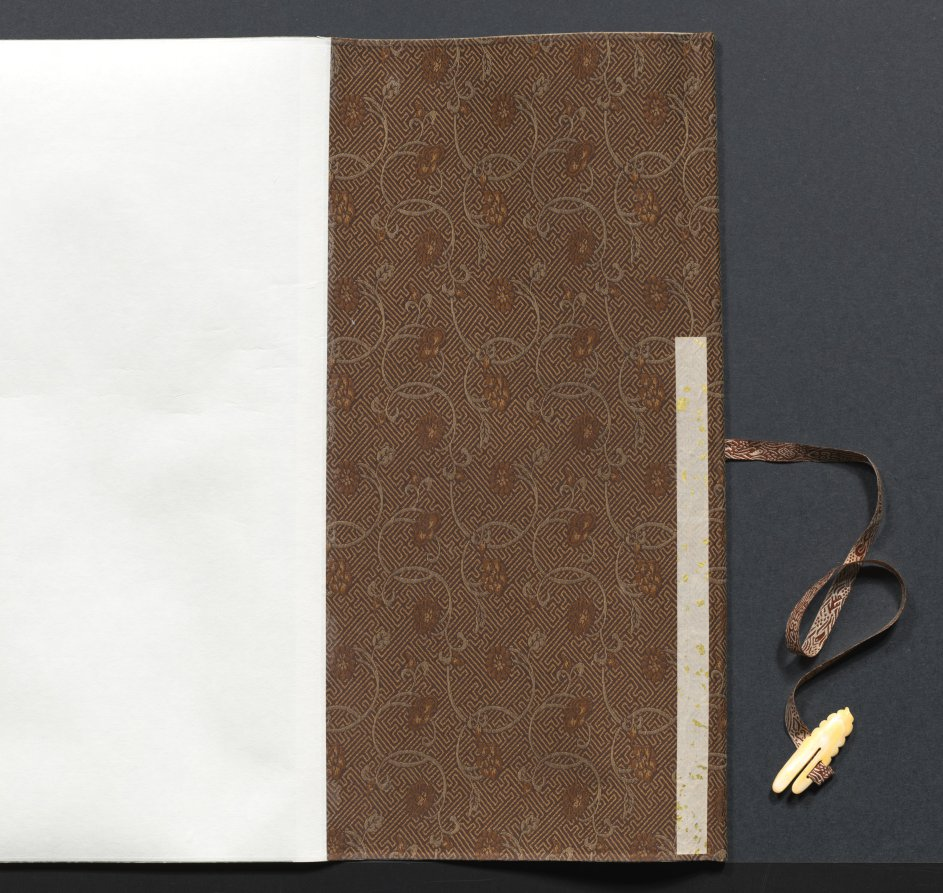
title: Calligraphy in Running Style based on Wang Bo's Essay on Tengwang Pavilion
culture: China, Changbai, Qing dynasty (1644-1911)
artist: Tiebao (Chinese, 1752–1824)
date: 1811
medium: handscroll, ink on paper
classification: Calligraphy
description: A member of the Donggo clan, Tiebao belonged to the Manchu Plain Yellow Banner army. As an official in the Qing court, he endured considerable vicissitude and his career was never smooth. Celebrated as a man of letters, he oversaw the publications of the Manchu military system as well as an anthology of poems by members of the imperial family and other Manchu dignitaries. In calligraphy, he was regarded as the equal of such eighteenth-century luminaries as Liu Yong (1720-1805) and Weng Fanggang (1733-1818). This handscroll is a work of his mature years and is exemplary of his disciplined and highly subtle approach to the art of calligraphy.